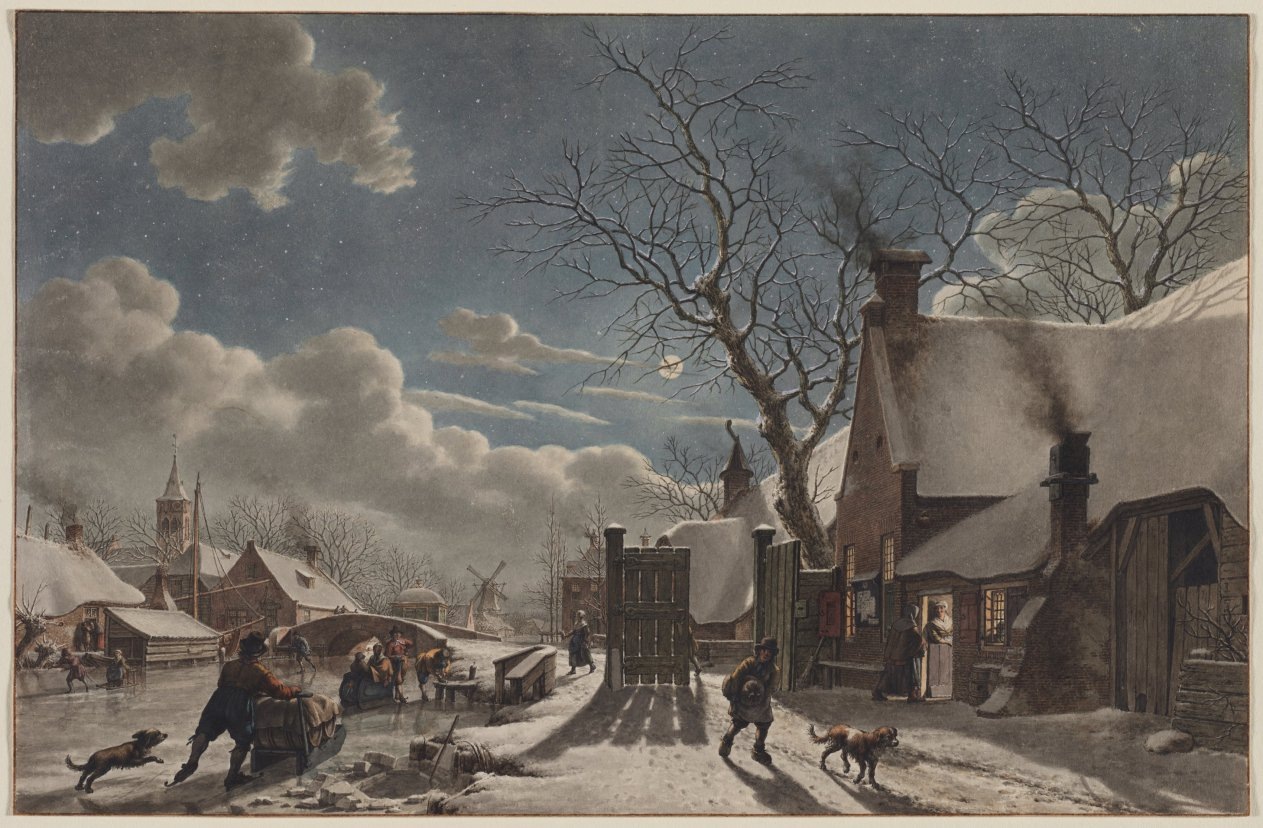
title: Winter Night in a Dutch Town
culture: Netherlands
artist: Jacob Cats (Dutch, 1741–1799)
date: 1797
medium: watercolor heightened with white gouache; framing lines in brown wash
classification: Drawing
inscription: VERSO, signed(?), lower left, in brown ink: J. Cats inv et fec / 1797 ; lower left, in brown ink: 3 [upside down] ; upper left, in red pencil: 314 / T. H. ; lower left, in graphite: Coll. ten Cate Nr. 195 / [75?].116 ; lower left, in graphite: 17 [erased] ; lower right, in graphite: Biz. [under remnants of brown paper label, with typed notation "Biz."] 134. ; lower right, media not discernible (under paper label): [illegible] ; lower right, in graphite: A096 [beneath remnant of brown paper label] ; lower right, in graphite: [illegible] ; lower right, in graphite(?): 41 ; FRAGMENT OF OLD MOUNT(now removed), in graphite: J. Cats drawing ; Coll. ten Cate no. 195